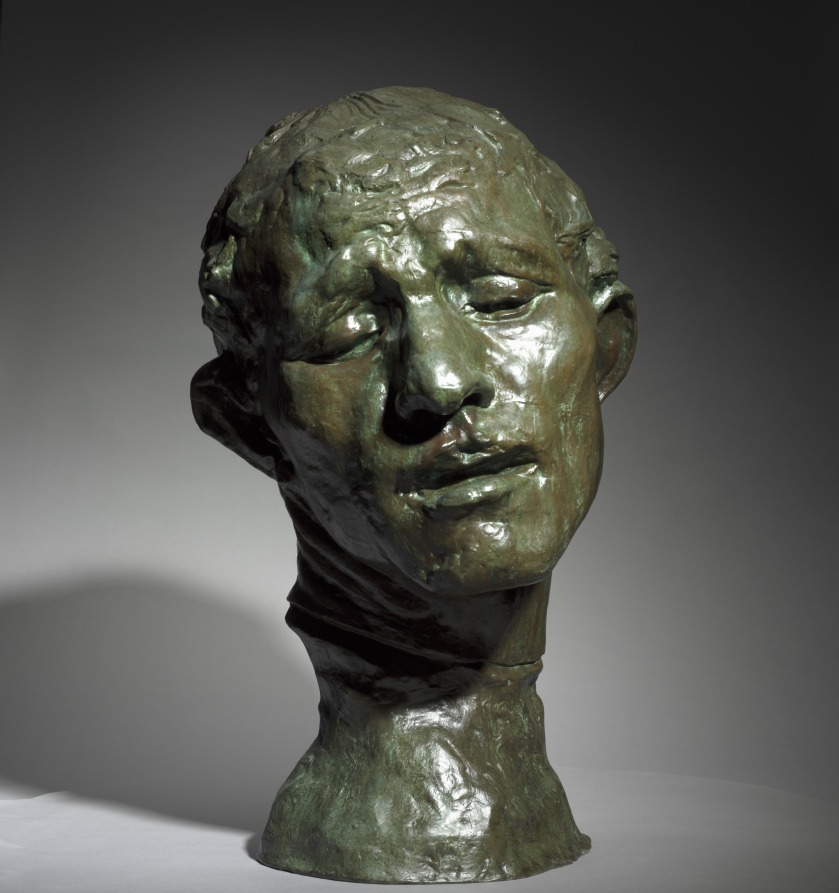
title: Heroic Head of Pierre de Wissant, One of the Burghers of Calais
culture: France, 19th century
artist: Auguste Rodin (French, 1840–1917)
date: 1886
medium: bronze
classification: Sculpture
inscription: inscribed at neck, left: A.Rodin; inscribed lower back: Alexis Rudier/Fondeur-Paris.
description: This sculpture depicts one of the figures in Rodin’s large public monument The Burghers of Calais (1884–89), featuring six French men who volunteered to be taken prisoner by the English in exchange for lifting the siege of Calais during the Hundred Years War (1337–1453). Pierre de Wissant’s anguished expression suggests extreme mental suffering as he contemplates his expected execution. Rodin exhibited a life-size version of the figure as an independent work before completing the monument. He later made multiple versions in various sizes and media.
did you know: This sculpture depicts the head of a figure from Rodin's large public monument The Burghers of Calais (1884-89). The CMA also owns a plaster version of the head.